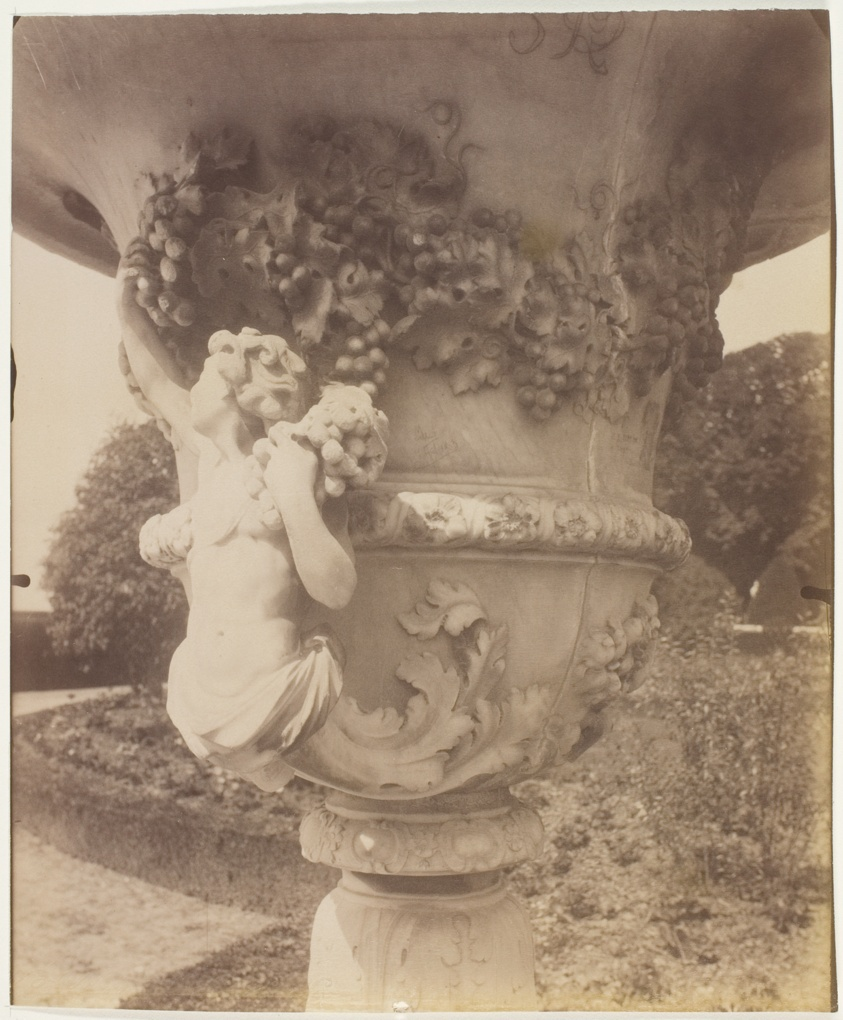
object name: Photograph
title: Versailles, Vase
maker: Jean-Eugène-Auguste Atget (French, 1857–1927)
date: 1905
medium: Albumen print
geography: France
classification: albumen silver print; photographic process; photography; photograph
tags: Collected by Hugh Edwards